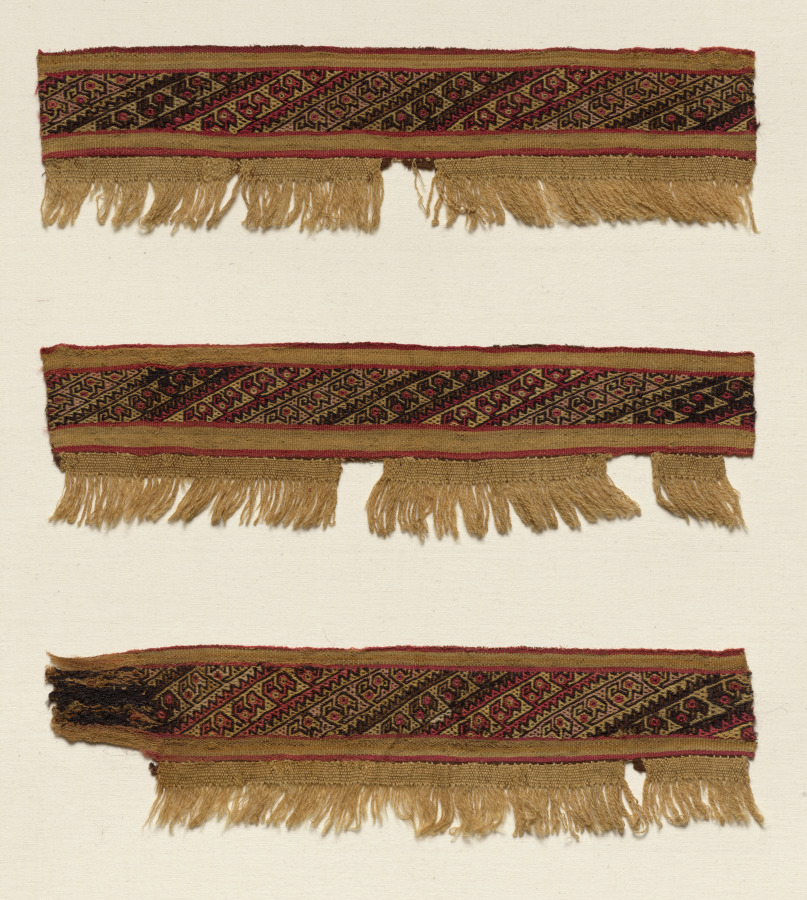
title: Three Fragments of a Border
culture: Peru, Central Coast, Chancay, 12th-15th century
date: c. 1100–1400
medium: tabby with inset border of fancy twill, brocaded; cotton and wool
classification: Textile